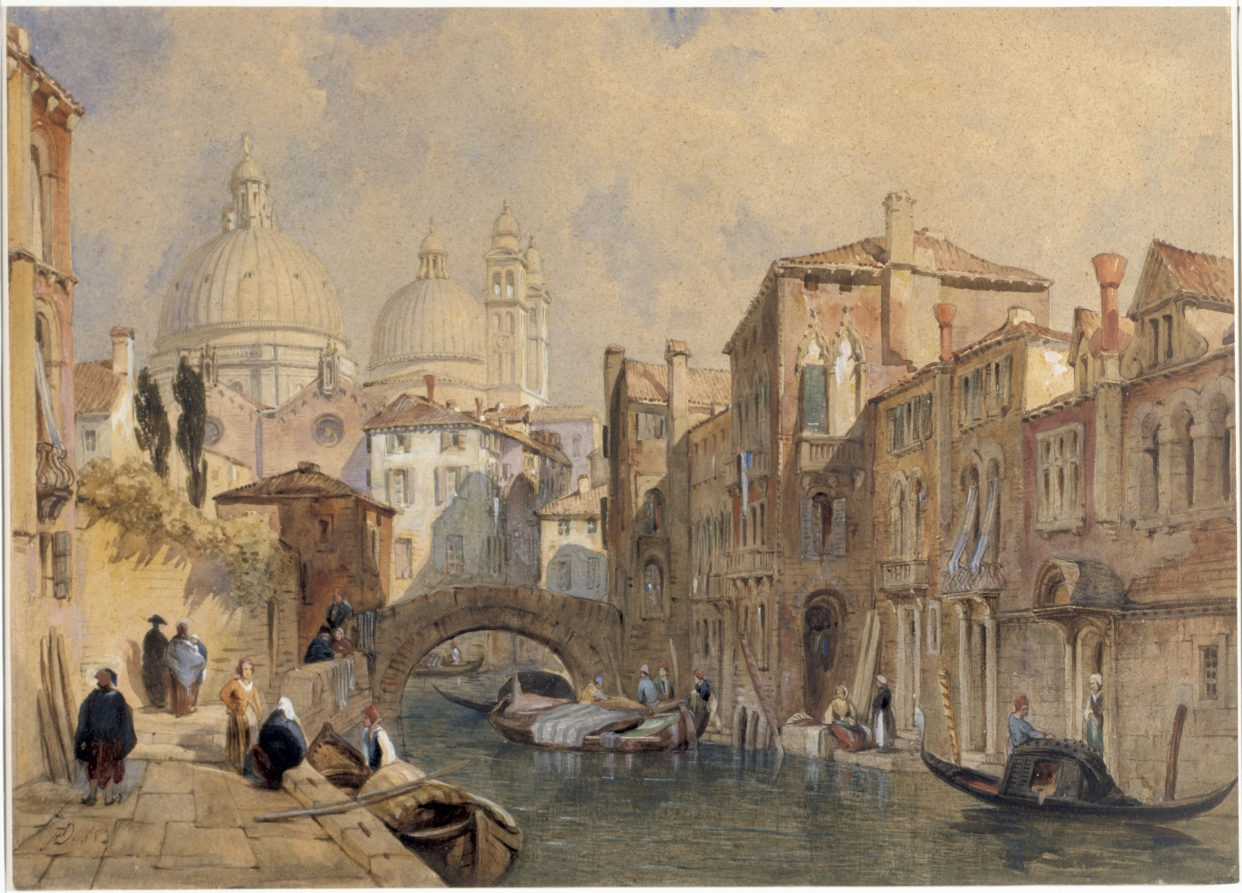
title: View of Venice: The Dome of Santa Maria della Salute Seen from the Rear of the Da Mula Palace, looking Eastward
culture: England, 19th century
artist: Frank Dillon (British, 1823–1909)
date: 1853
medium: watercolor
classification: Drawing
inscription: lower left, in watercolor: FD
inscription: [artist's monogram] 1853